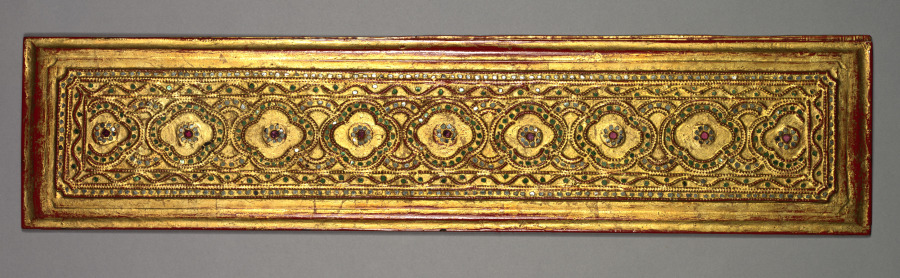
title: Top cover from a Kammavacha: Buddhist Ordination Text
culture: Myanmar (Burma)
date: 1800s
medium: Cover: lacquer, gilding, and glass appliqué on wood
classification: Manuscript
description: In premodern Burma, lay people commissioned lavishly ornamented manuscripts for ceremonial occasions, when officiants would read aloud from the text. Written in black lacquer, the text is in the language of Pali written in a Burmese script. It contains ordination rites and procedures for monastic ceremonies. The second to last page is covered with intricately drawn, winged celestial beings (nats) in gestures of praise. They fly amid intertwining vegetation—denoting bounty—that grows from serpentine forms that refer to rain clouds. Lionlike forms inhabit the space with them. The top and bottom covers are equally ornamented with jeweled floral patterning.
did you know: The Pali text of this manuscript is written in Burmese square script, which is also known as "tamarind seed script."